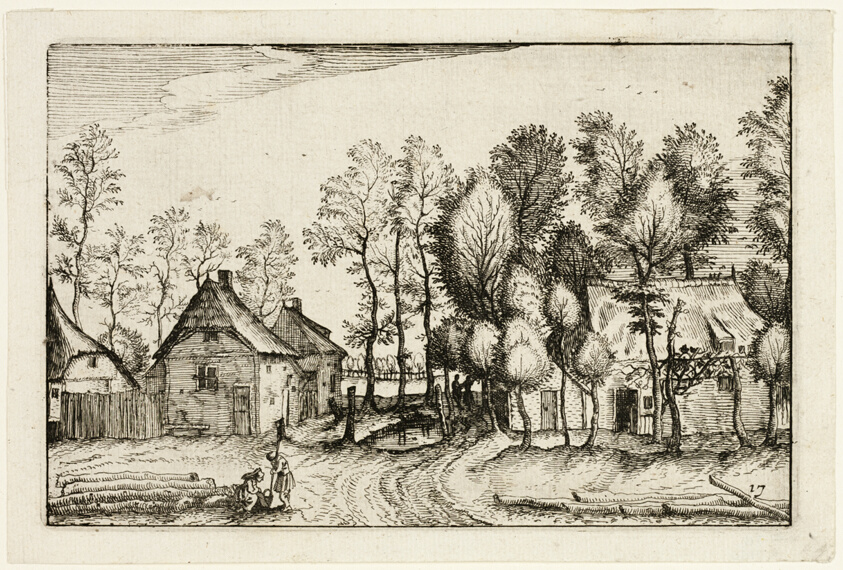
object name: Print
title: Landscape with Hewed Trees, plate seventeen after Pictures of Farms, Country Houses and Rustic Villages (Praediorum villarum et rusticarum casularum icones)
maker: Claes Jansz. Visscher (Dutch, 1587-1652); after Unknown Flemish Artist, misidentified as Pieter Bruegel, the elder (Flemish, 1525/30-1569)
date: 1612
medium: Etching in black on ivory laid paper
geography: Netherlands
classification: etching; print; prints and drawing